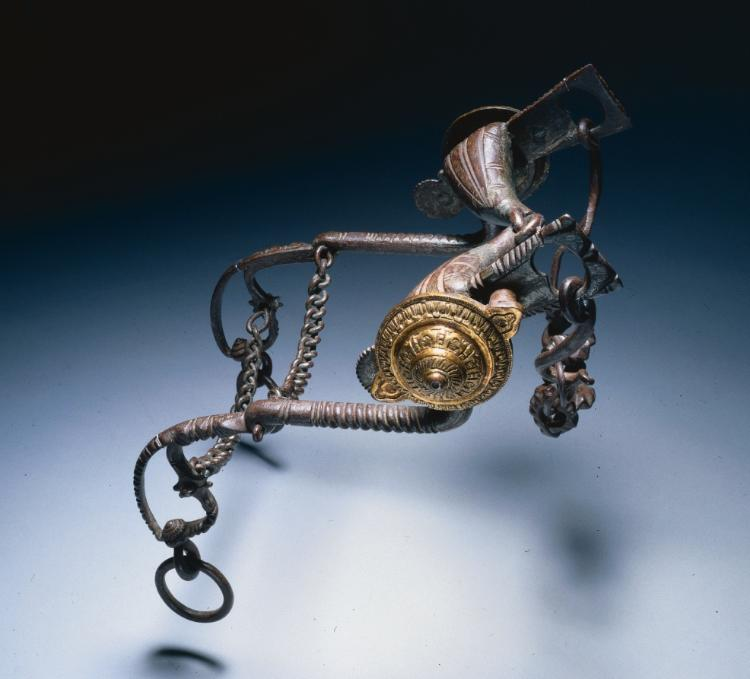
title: Curb Bit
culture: Italy, late 16th Century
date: c. 1580–1600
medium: iron with gilt bronze bosses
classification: Arms and Armor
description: A well-constructed curb bit was an essential piece of equipment for keeping a powerful battle stallion under control. Like other horse trappings, bits were often elegantly fashioned and ornamented. This example has applied and gilded bosses.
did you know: A curb bit uses lever action, meaning that it multiplies the pressure applied by the rider.